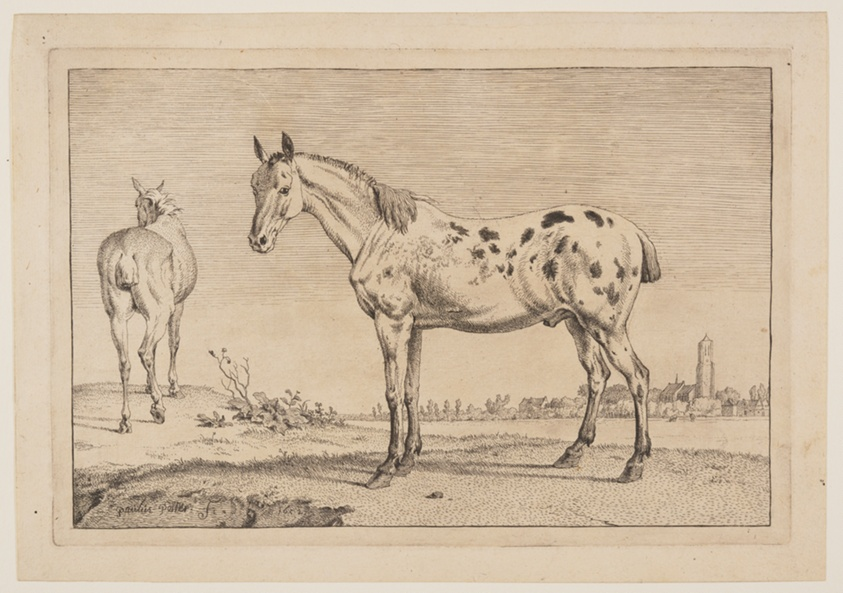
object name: Print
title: The Neighing Horse, from Series of Horses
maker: Paulus Potter (Dutch, 1625–1654)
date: 1652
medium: Etching on ivory laid paper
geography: Netherlands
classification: print; paper; prints and drawing; etching